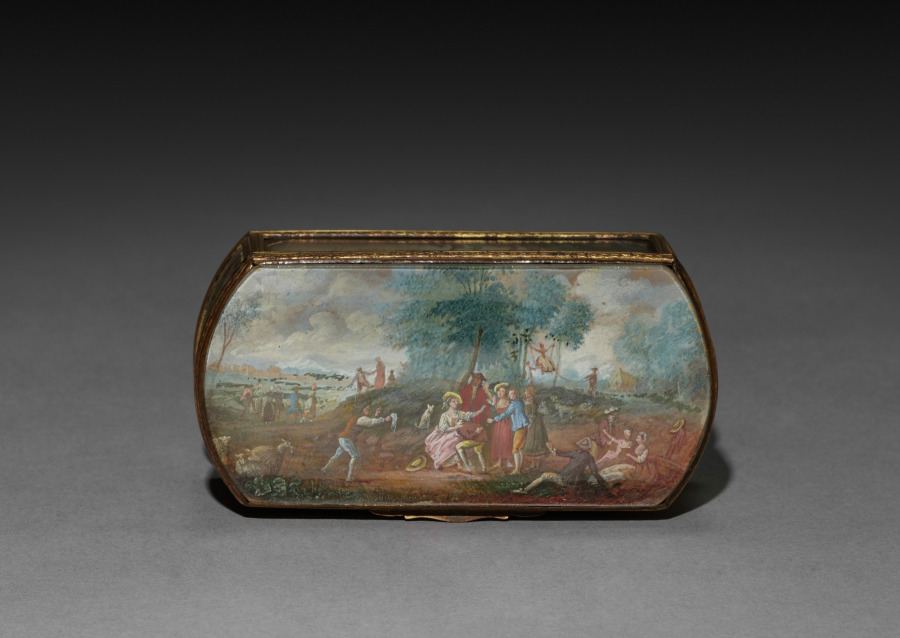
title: Snuff Box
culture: France, 19th century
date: 1800s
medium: gilt metal box with painted miniatures under glass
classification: Miscellaneous